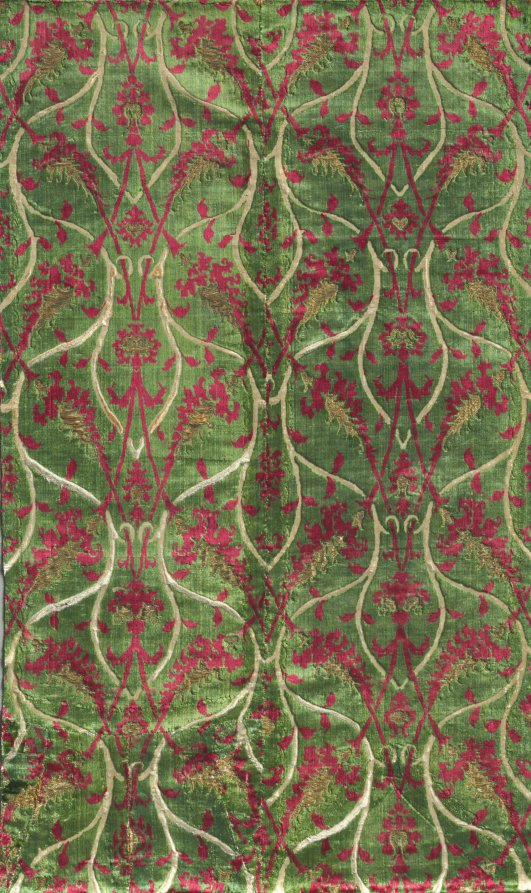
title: Two-color Velvet with Gold in a Double Curved Lattice Pattern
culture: Italy, possibly Florence, 15th century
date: 1450–1500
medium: silk, gold thread; polychrome velvet: cut pile, brocaded, and voided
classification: Velvet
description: Although plain velvets were woven in Italy by the end of the 13th century, polychrome-patterned velvets were not produced until the late 14th century. This velvet with two colors of pile incorporates a limited amount of costly gold thread while a fourth color, ivory, is formed by the satin weave of the foundation, called voided velvet. Palmette leaves composed of gold thread and crimson pile dominate the pattern on the green pile ground. The palmettes are arranged in an overlapping curved layout, popular in Italy and in Ottoman Turkey during the second half of the 15th century.